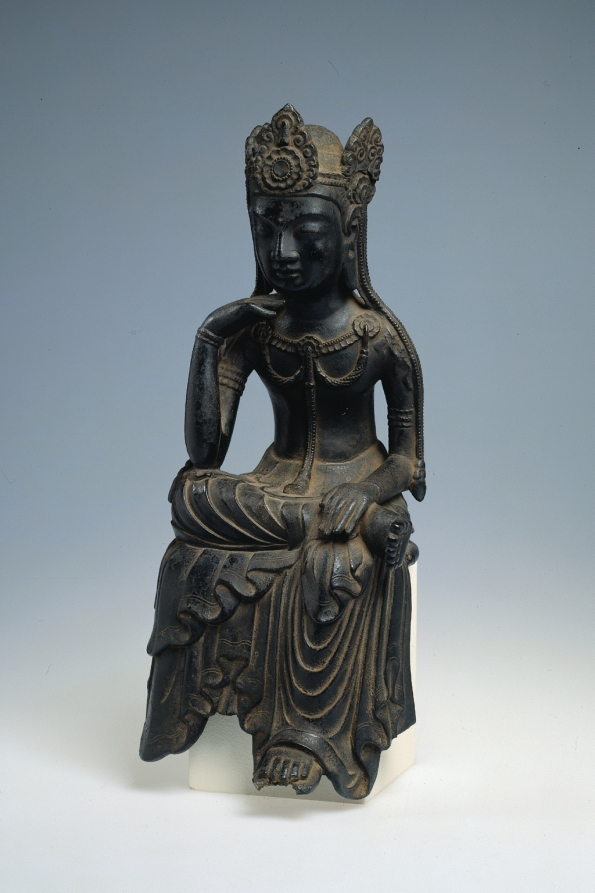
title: Buddha of the Future (Miroku Bosatsu)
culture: Japan, Asuka period (538–710)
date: late 600s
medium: cast bronze, incised, with traces of gilding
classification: Sculpture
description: Buddhism was introduced to Japan in the sixth century. For early Japanese devotees, Buddhism offered the promise of salvation through faith in the Buddha of the Future, who would appear at the end of the world. The concept of eternal salvation held particular resonance with the Japanese aristocracy, who became the staunchest supporters of this new faith. Small sculptures like this one, with its gentle grace and powerful presence, were popular devotional objects.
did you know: The Sanskrit name of this being, Maitreya, derives from the Sanskrit word for friend, mita.